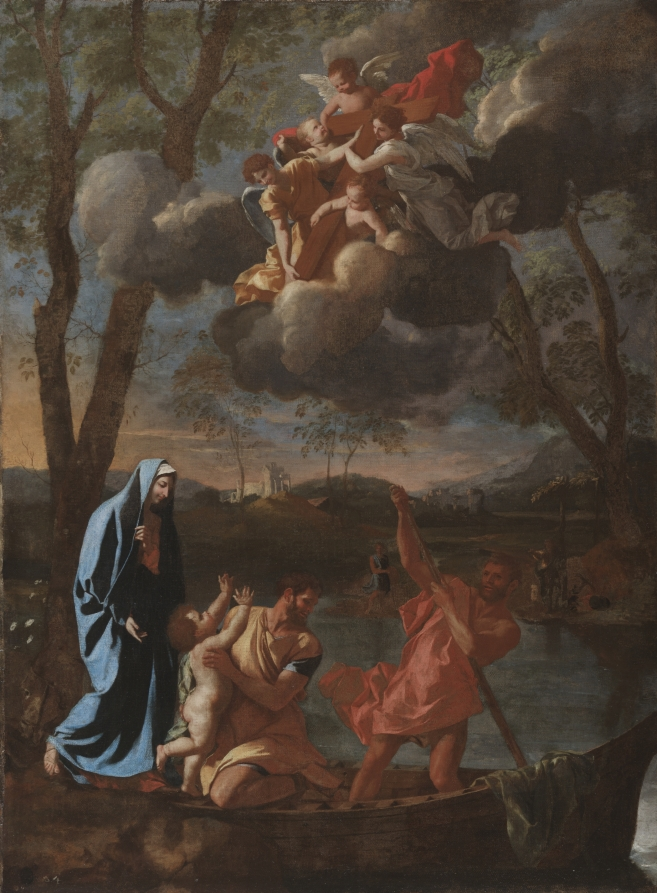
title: The Return of the Holy Family to Nazareth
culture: France, 17th century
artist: Nicolas Poussin (French, 1594–1665)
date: c. 1627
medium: oil on canvas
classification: Painting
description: When King Herod learned that he would lose his throne to a child born in Bethlehem, he ordered all male infants to be massacred. Mary and Joseph thus fled to Egypt to protect their son, Jesus. The age of the boy in this painting suggests that Poussin depicted the less-common subject of the Holy Family’s return from Egypt. Jesus reaches toward a vision of a cross borne by angels, a reference to both his eventual crucifixion and Herod’s cruel slaughter of innocent children.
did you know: Nicolas Poussin used wax figures and wetted paper or fabric to model the bodies in his paintings, helping him to capture the realistic folds, movement, and balance of light and shadow.